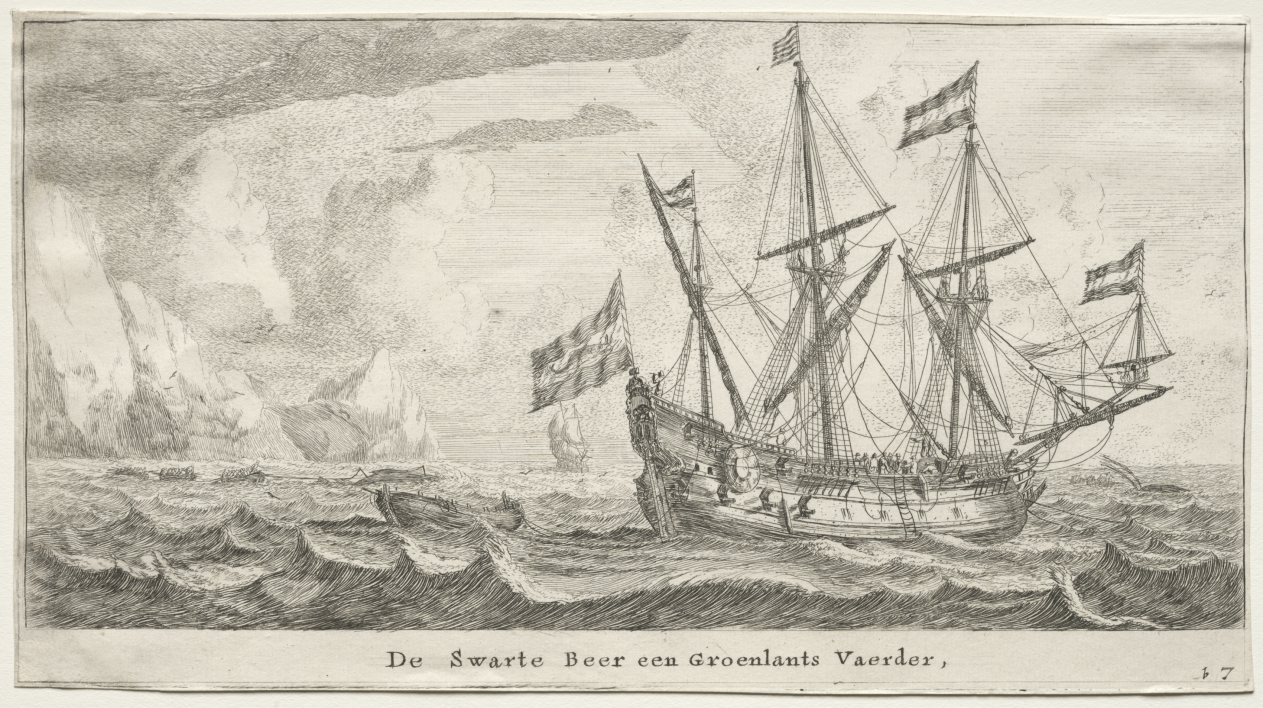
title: Various Ships and Views of Amsterdam (Verscheÿde Schepen en Gesichten van Amstelredam), Part II: The Black Bear, a Greenland Whaler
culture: Netherlands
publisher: Clement de Jonghe (Dutch, 1579–1679)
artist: Reinier Nooms, called Zeeman (Dutch, c. 1623–1664)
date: 1652–54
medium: etching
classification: Print